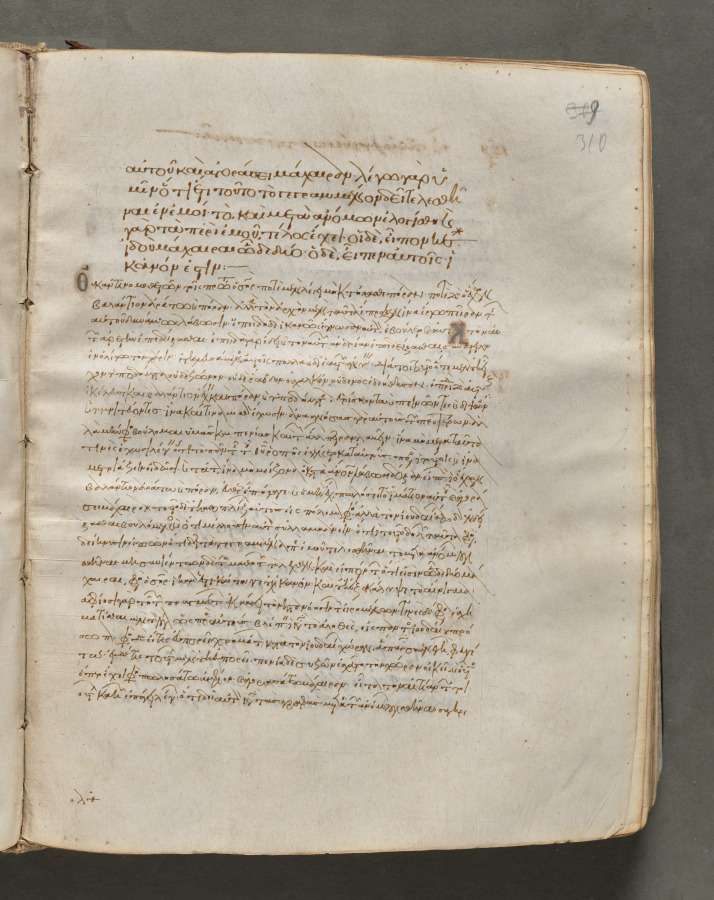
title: Text, folio 310 (recto), from a Gospel Book with Commentaries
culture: Byzantium, Constantinople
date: c. 1000–1100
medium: ink, tempera, and gold on vellum; leather binding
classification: Bound Volume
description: Each of the four gospels in this book opens on a page with brilliantly illuminated borders depicting the author of the text as well as birds—principally peacocks, symbols of the immortality of the soul—and fountains, representing the fountain of life and the salvation of the soul. This volume consists of 428 leaves with texts in Greek. Its level of sophistication suggests that it was probably written and decorated in a monastery in Constantinople.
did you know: Gospel books were carried in procession through Byzantine churches.